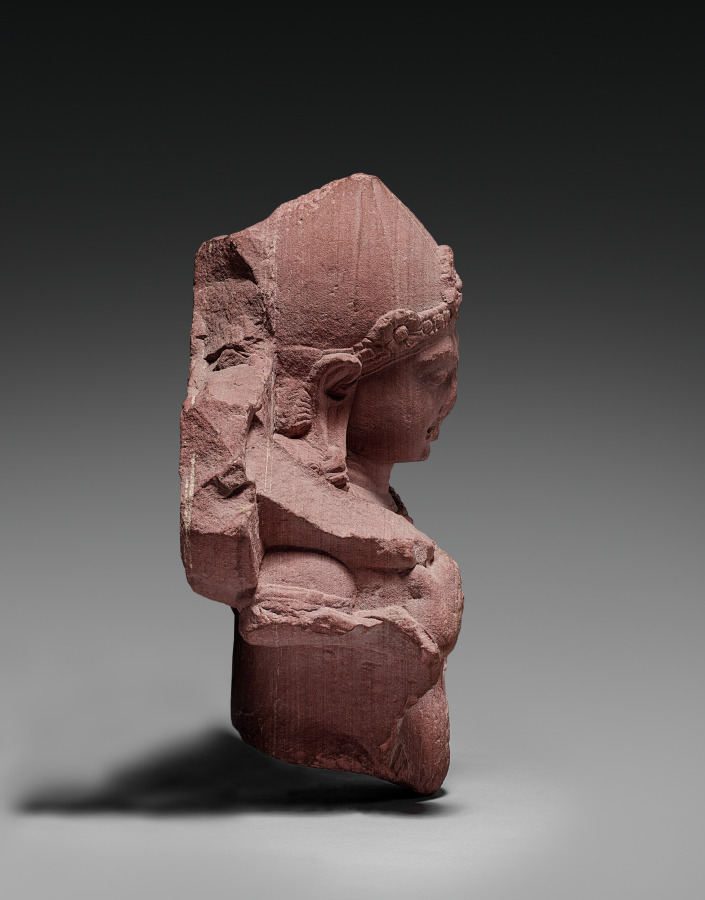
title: Attendant of Surya, the Sun God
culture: India, Mathura, Gupta Period (320-647)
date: 320–650 CE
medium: sandstone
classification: Sculpture